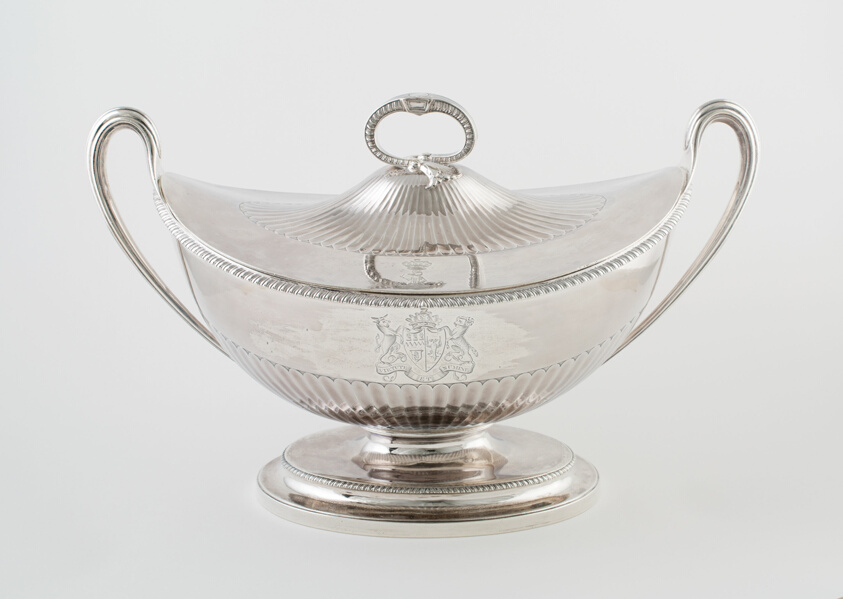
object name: Metalwork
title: Tureen with Cover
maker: John Wakelin and William Taylor; English, in partnership 1776-c. 1792; London, England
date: 1783/84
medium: Silver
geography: London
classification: silver; metalwork; european decorative arts